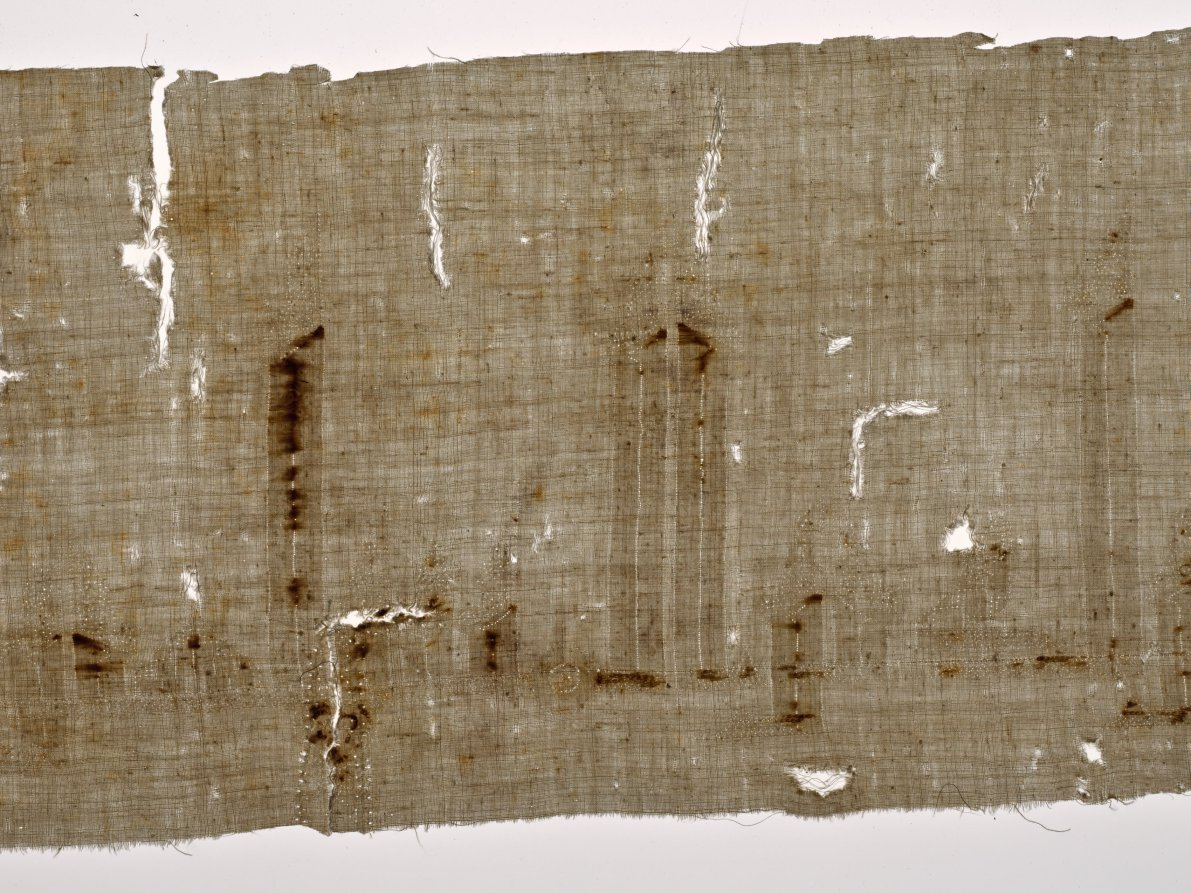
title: Tiraz of Caliph ‘Abd al-Rahman III, from the reliquary of Santa Librada, Cathedral of Seqüenza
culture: Spain, Cordoba, Spanish Umayyad period (756–1031)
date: 941–42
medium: Linen; silk: embroidery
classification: Embroidery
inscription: only the traces of a very large-scale elaborately foliated Kufic inscription preserved, largely in the form of needle holes but with a few small areas where the stitches are intact. This is approximately the second half of the original full inscription, which measured well over two meters long; the bulk of the original textile with the first half of the inscription was formerly preserved in the Cathedral of Siquenza. As preserved on the two fragments, the full inscription reads: "[Commander of the Be]lievers al-Masir li-Din al-Muslimin, may God support him! That which was made through the agency of Durri, his servant, in the year thirty and three hundred."